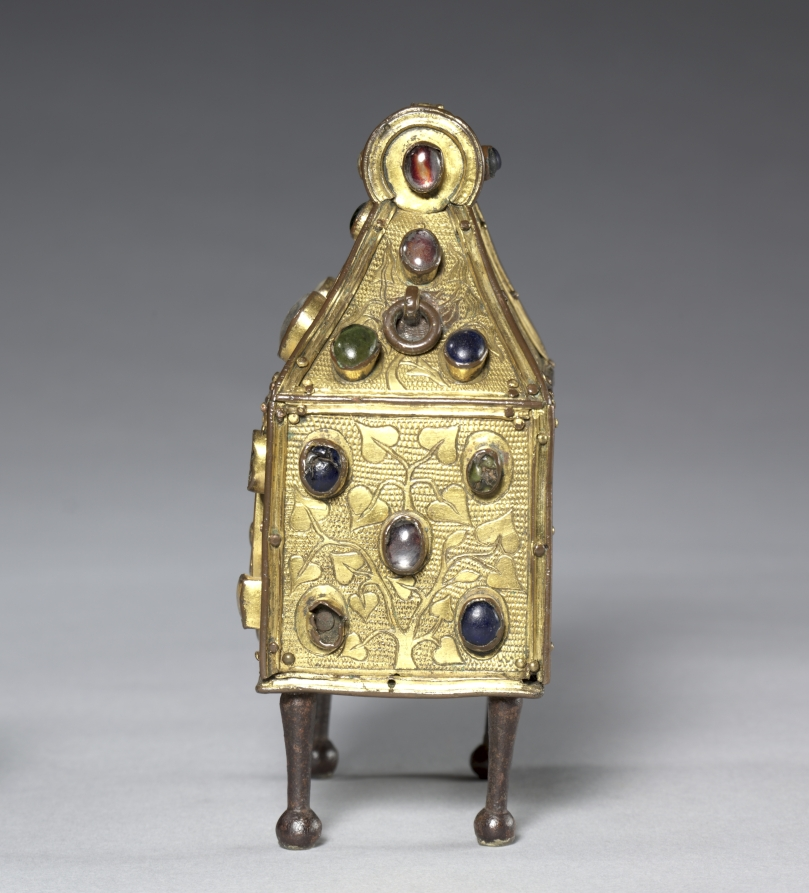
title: Reliquary in Purse Form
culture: Germany, Upper Rhine, Southern Swabia, Gothic period, 14th century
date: c. 1320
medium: copper, gilded and engraved; glass; rock crystal; precious stones; wood core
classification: Metalwork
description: This precious reliquary, adorned on its front and sides with colored glass, precious stones, and two medallions featuring the enthroned Virgin and Child and an eagle, forms part of a group of closely related objects manufactured in the Upper Rhine region shortly after 1300. The purse shape, with its peaked roof and cylindrical top, derives from much earlier Carolingian and Romanesque prototypes. The reliquary was originally suspended from the rings on both sides of the sloping roof.